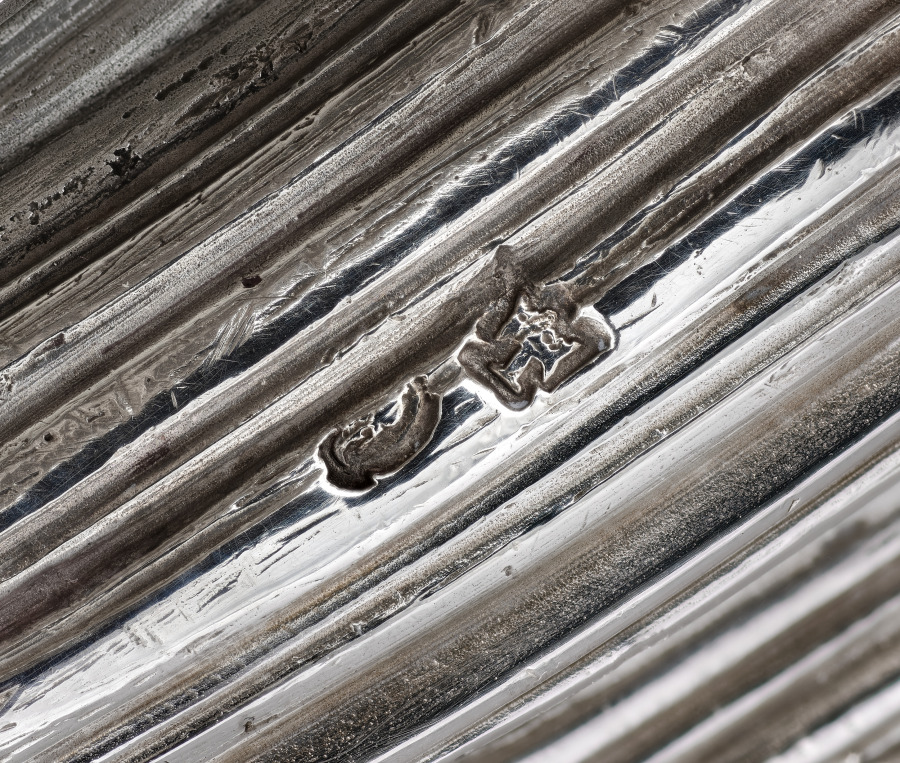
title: Tureen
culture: France, Paris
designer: Juste-Aurèle Meissonnier (French, 1695–1750)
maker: Pierre-François Bonnestrenne (French)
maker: Henry Adnet (French, 1745)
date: 1735–38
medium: silver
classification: Silver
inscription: engraved Meissonnier signature.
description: See entry for cover record 1977.182.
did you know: The langoustine, pigeon, and vegetables were cast using real examples giving the silver copies lifelike detail and appearance.